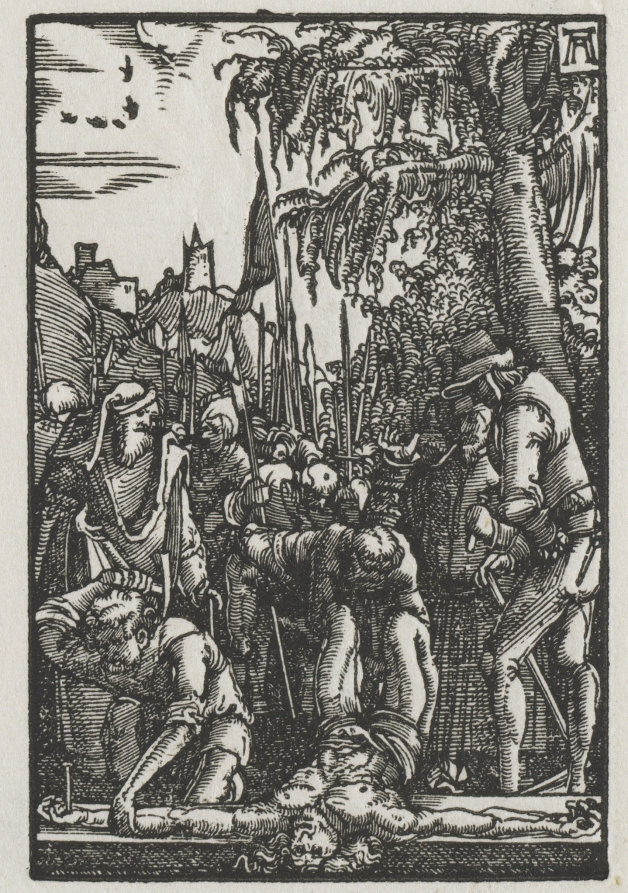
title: The Fall and Redemption of Man: Christ Nailed to the Cross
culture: Germany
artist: Albrecht Altdorfer (German, c. 1480–1538)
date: c. 1515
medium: woodcut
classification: Print